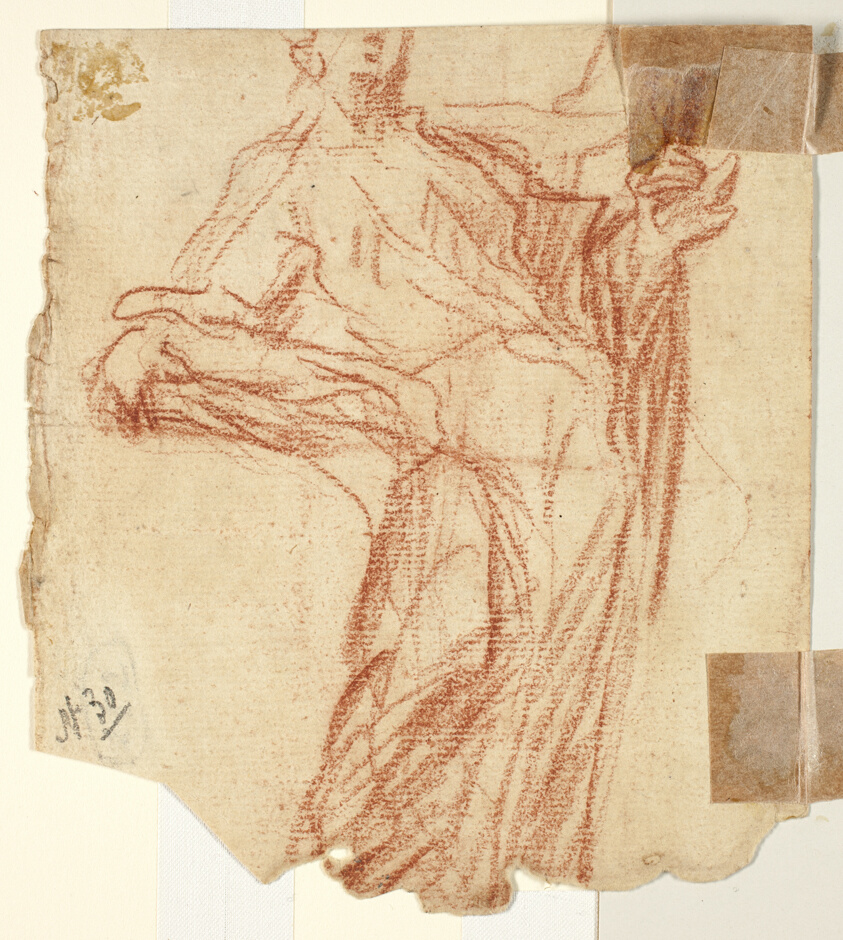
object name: Drawing and Watercolor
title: Apostle (recto); Standing Female Figure (verso)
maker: Circle of Carlo Maratti (Italian, 1625-1713)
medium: Red chalk, heightened with touches of white chalk (recto), and red chalk (verso), on tan laid paper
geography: Italy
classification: chalk; drawings (visual works); prints and drawing